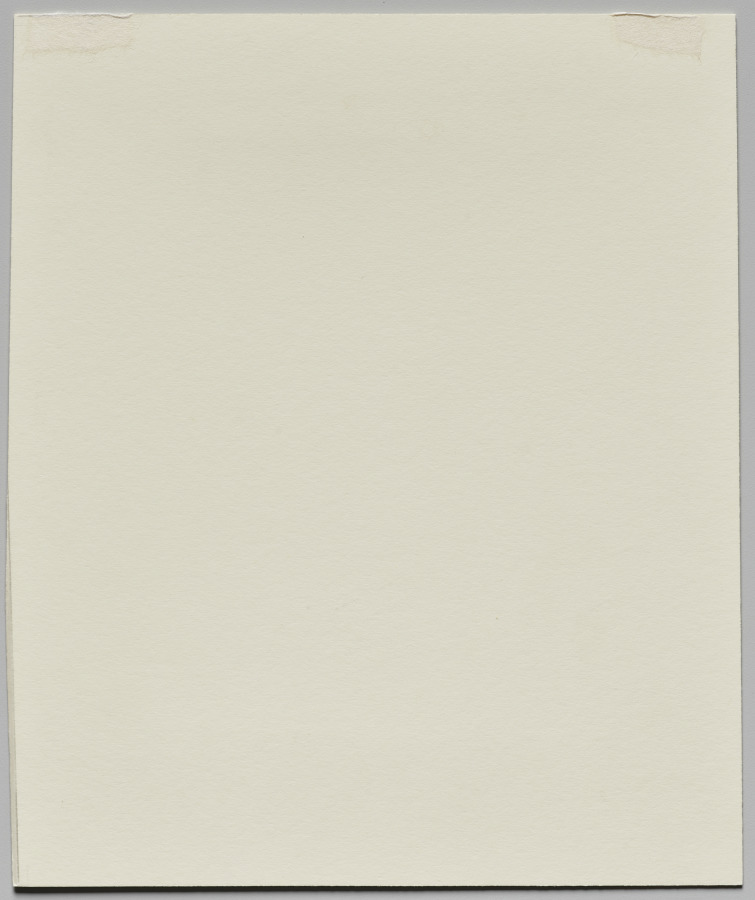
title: Trees and Roots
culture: France, 20th century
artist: Eugène Atget (French, 1857–1927)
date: 1900s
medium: albumen print from wet collodion negative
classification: Photograph